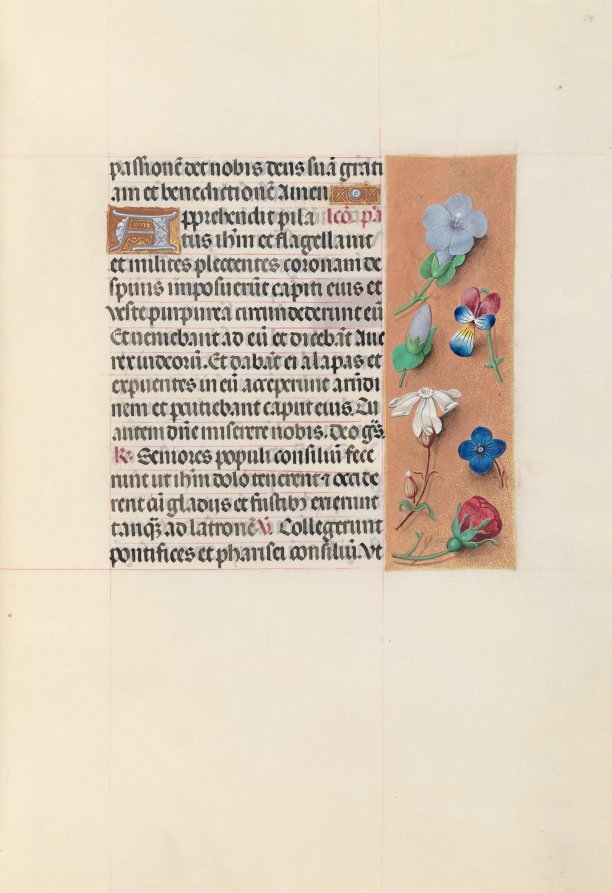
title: Hours of Queen Isabella the Catholic, Queen of Spain: Fol. 54r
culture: Flanders, Ghent and Bruges, late 15th century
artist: Master of the First Prayerbook of Maximillian (Flemish, c. 1444–1519)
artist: and Associates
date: c. 1500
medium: ink, tempera, and gold on vellum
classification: Bound Volume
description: This manuscript was illuminated by a circle of at least five highly organized manuscript painters active in the Flemish cities of Ghent and Bruges. The principal illuminator was Alexander Bening, who painted the majority of the book's miniatures. Manuscripts produced by this circle of artists are renowned for the decoration of their borders, which typically feature a rich variety of realistically-painted flowers, birds, and butterflies. This prayer book, called a book of hours, was intended not for a cleric, but for the private devotions of a lay person-in this case, Isabella the Catholic, Queen of Spain (1451-1504). Isabella's coat of arms embellishes the book's frontispiece. It is unlikely that the book was commissioned by the Queen herself; rather, she probably received it as a diplomatic gift from someone courting her patronage, perhaps Cardinal Francisco Jimenez de Cisneros. A Franciscan friar, Jimenez was dependent upon Isabella for his advancement, first to the post of Queen's confessor in 1492, and then to Archbishop of Toledo in 1495.